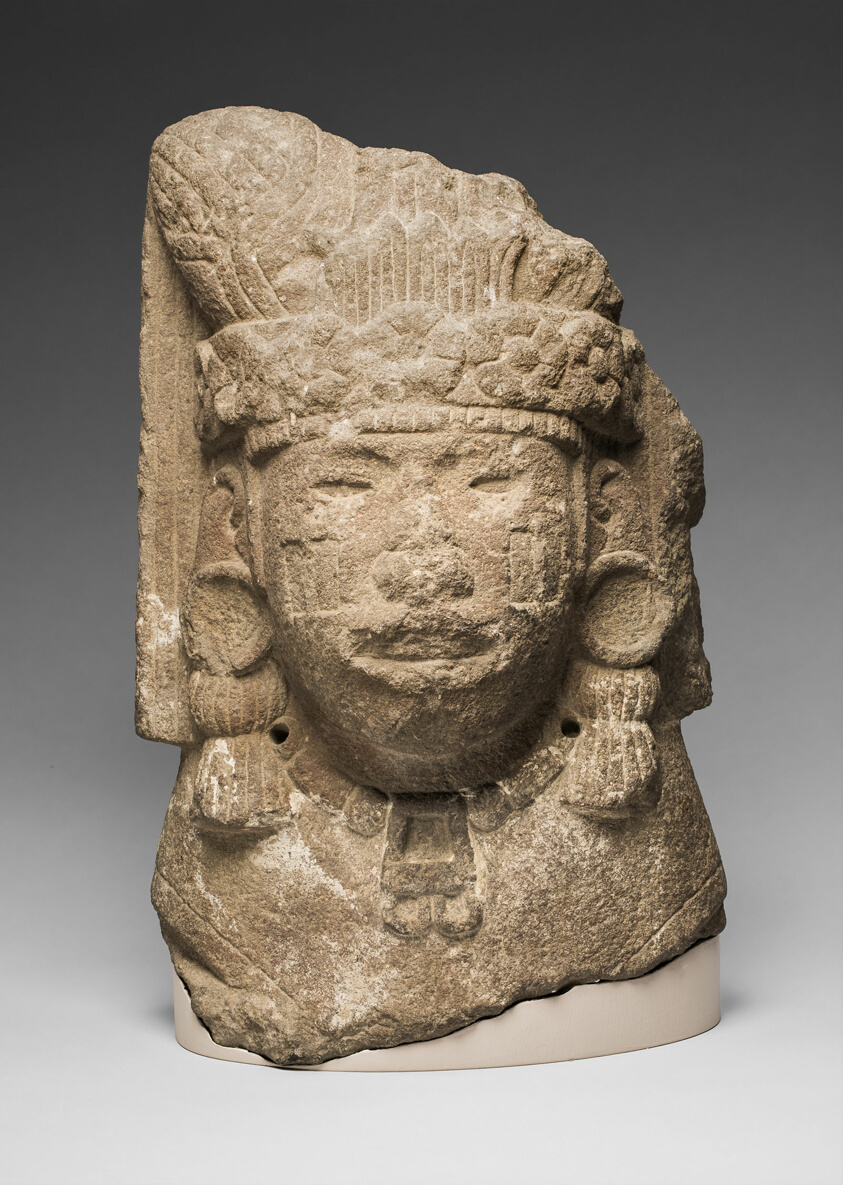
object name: Sculpture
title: Head of Xilonen, the Goddess of Young Maize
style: aztec, mesoamerican, Pre-Columbian, americas, Arts of the Americas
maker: Aztec (Mexica) (Tenochtitlan, Mexico)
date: 1400–1500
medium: Basalt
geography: Tenochtitlan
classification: stone; sculpture; art of the americas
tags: landscapes, cornstalks, agriculture, goddesses, maize, mythology